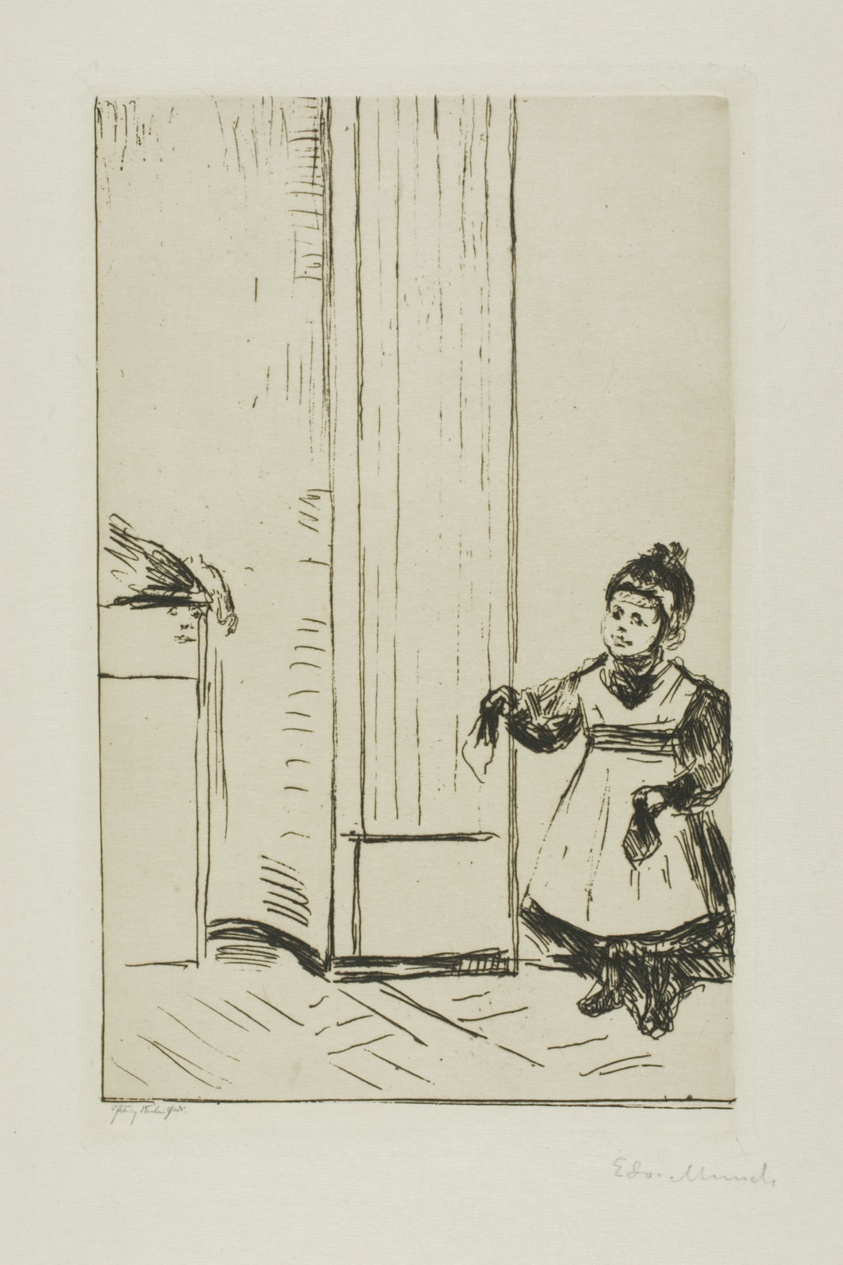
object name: Print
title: Interior with a Child. Lothar Linde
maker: Edvard Munch (Norwegian, 1863-1944)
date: 1902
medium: Etching on cream wove paper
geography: Norway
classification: etching; print; prints and drawing